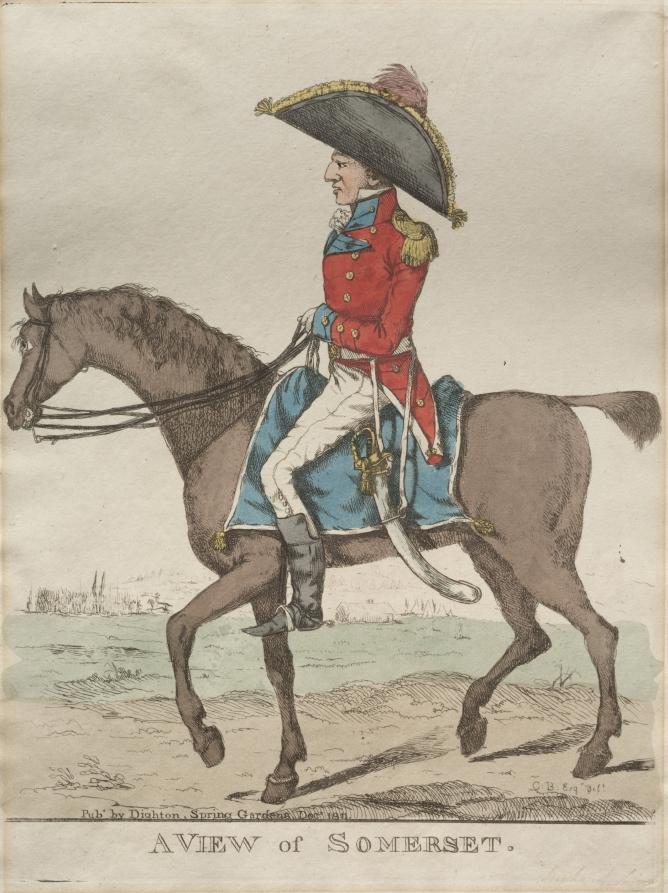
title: A View of Somerset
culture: England, 19th century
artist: Richard Dighton (British, 1795–1880)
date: 1811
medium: etching, hand colored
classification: Print